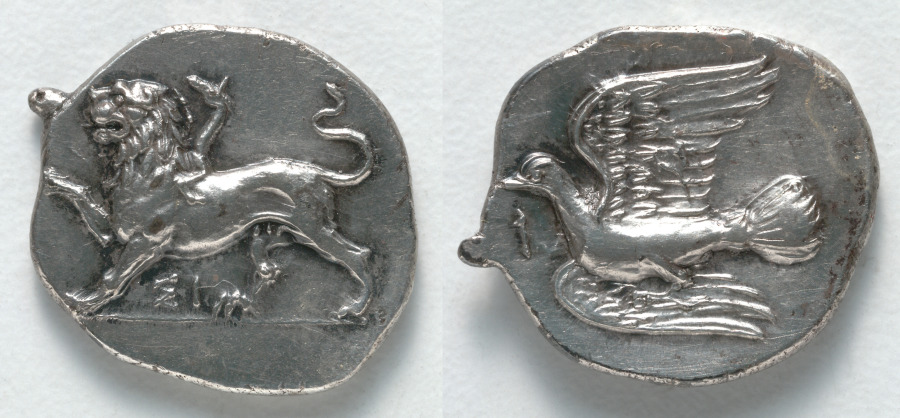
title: Hemidrachm: Chimaera (obverse); Dove (reverse)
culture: Greek, minted at Sikyon (Peloponnesos)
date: 400–323 BCE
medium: silver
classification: Coins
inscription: ΣΙ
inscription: I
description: The lion, king of the beasts and an animal associated with regal and heroic power, featured prominently on the coinage of many ancient Greek city-states. Artists placed the lion in a variety of poses, sometimes including the whole body, at other times the foreparts or just the head. Although it may once have roamed nearby, for many Greeks the lion was a monster nearly as exotic as the Chimaera, of which it formed a part (together with a goat head and snake-headed tail, as seen on this Sikyonian coin).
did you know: The monstrous chimaera adds a goat head and snake-headed tail to the already fearsome lion.